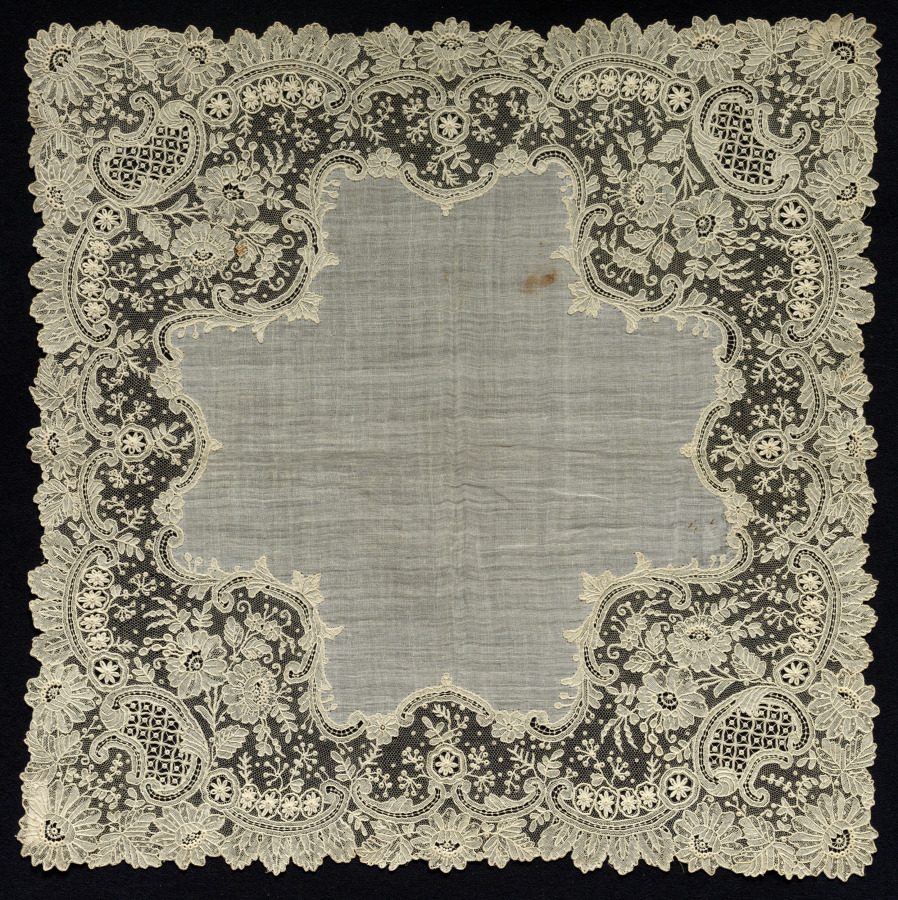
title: Lace Handkerchief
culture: Belgium, Brussels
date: 1850–75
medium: Needle lace (point de gaze)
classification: Lace